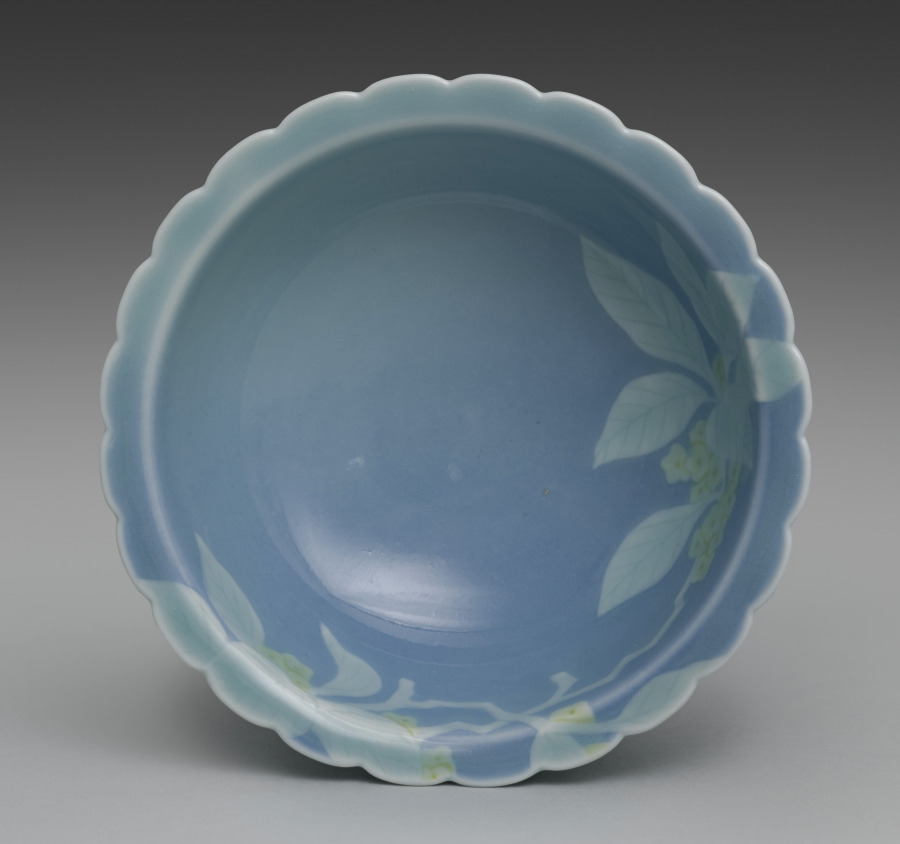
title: Dish from Dishes with Flowers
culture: Japan, Taishō period (1912–26) or Shōwa period (1926–89)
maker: Seifū Yohei IV (Japanese, 1872–1951)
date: 1914–46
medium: One from a set of five dishes; porcelain with underglaze yellow and blue glaze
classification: Ceramic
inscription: 清風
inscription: 清風造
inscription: 成山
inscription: 清風盧人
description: One can imagine a cool summer breeze when looking at this set of dishes, each shaped with a crenulated mouth and glazed with blue. Around the rim and into the basin, the bowls have low-relief designs of flowers with underglaze yellow petals; their leaves and stems show white through the glaze. On each dish, the design continues over the rim onto one side.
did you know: Seifū Yohei IV’s dishes with flowers feature underglaze yellow.